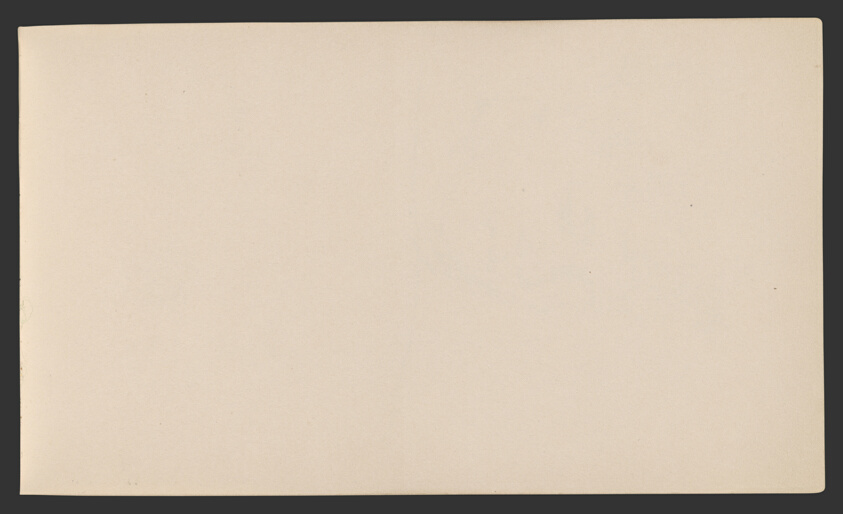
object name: Drawing and Watercolor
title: Sketchbook No. 2 (L'Estaque)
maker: Paul Cézanne; French, 1839-1906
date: 1875–86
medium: Graphite and pen and ink drawings on paper, bound into a book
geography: France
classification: sketchbook; graphite; prints and drawing; paper